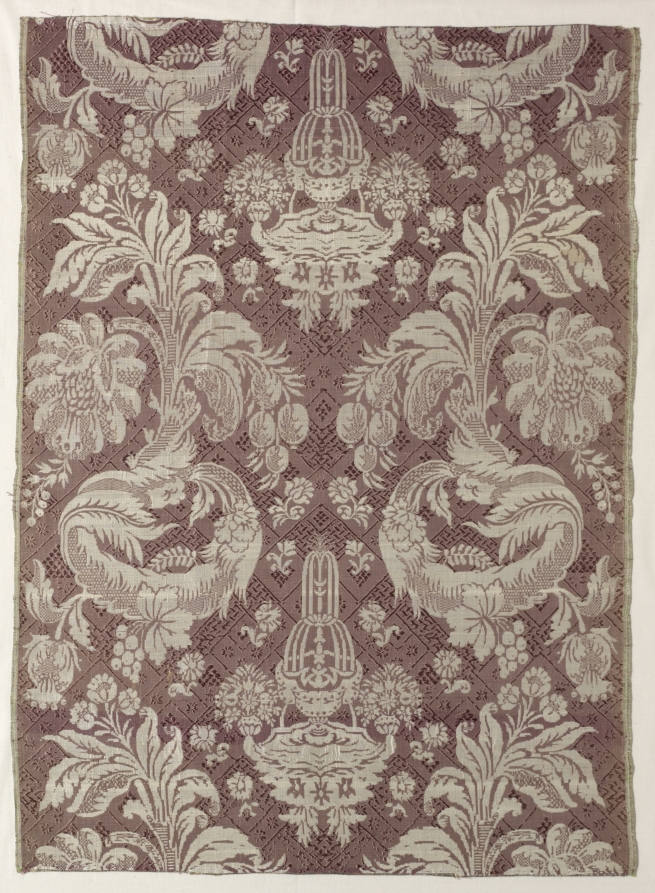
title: Length of Textile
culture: France or Italy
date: early 1700s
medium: silk with supplementary weft brocading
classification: Textile